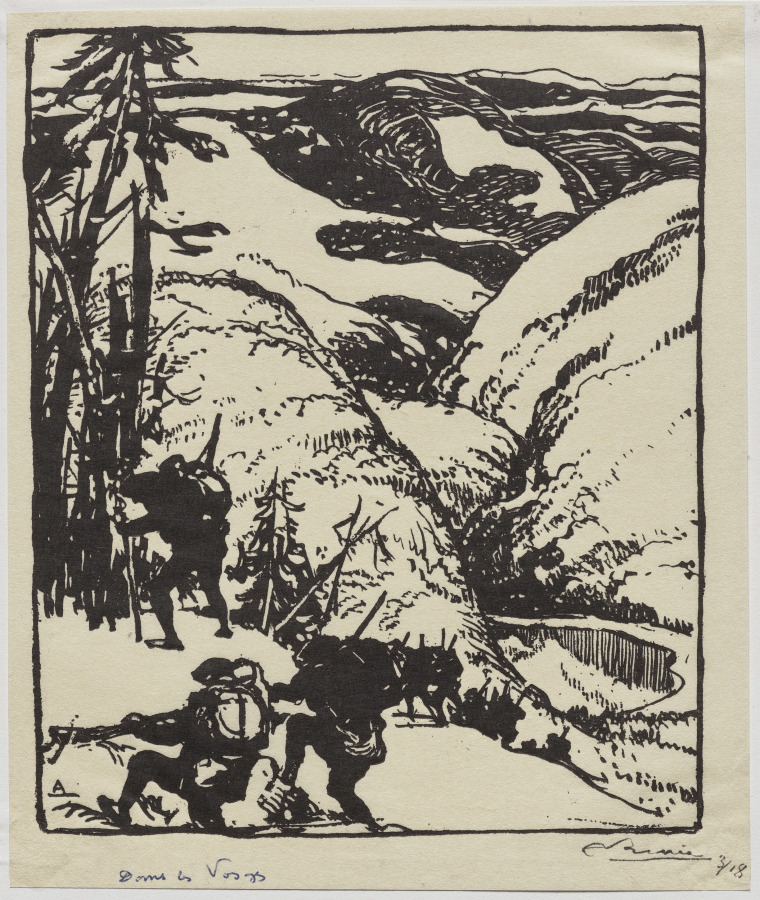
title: Dans les Vosges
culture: France, 20th century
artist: Auguste Louis Lepère (French, 1849–1918)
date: 1914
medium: brush and black ink over pencil with white highlights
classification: Drawing